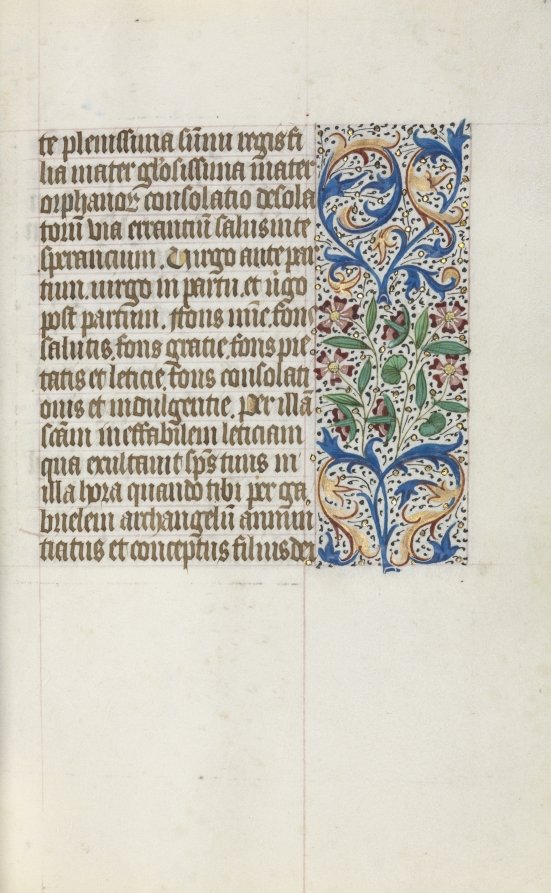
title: Book of Hours (Use of Rouen): fol. 19r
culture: France, Rouen, 15th century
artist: Master of the Geneva Latini (French, active Rouen, 1460–80)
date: c. 1470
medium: ink, tempera, and gold on vellum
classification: Bound Volume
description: In the late 1400s and early 1500s Rouen was an established and important center of book production. The city’s cathedral had a wealthy chapter that spent large sums of money to commission books and to maintain its extensive library. The stationers and booksellers would have likely been concentrated in or near the cathedral precinct. This artist, named after a manuscript now in Geneva, was Rouen’s principal illuminator during the second half of the 1400s.